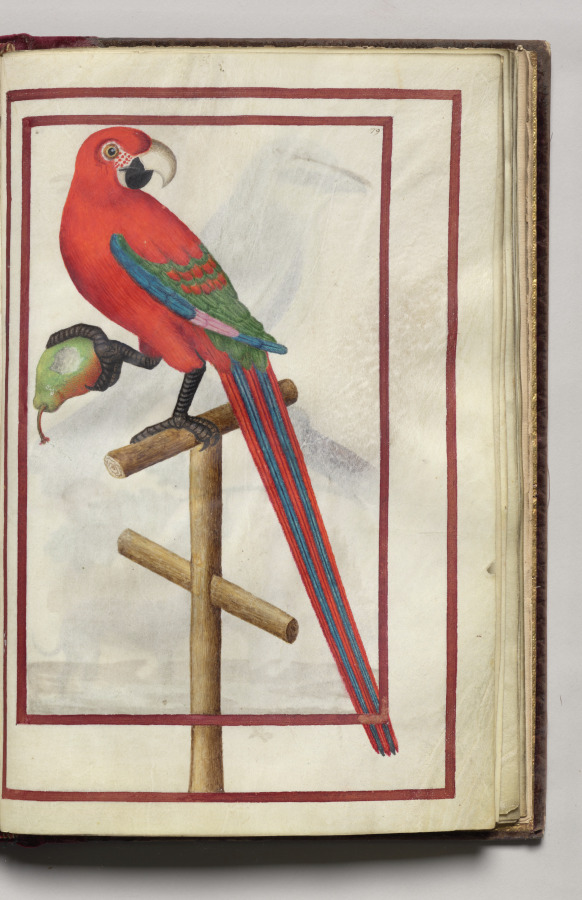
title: Parrot with a Pear, folio 38 (recto), from Florilegium (A Book of Flower Studies)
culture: France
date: 1608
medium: watercolor, ink, silver, and gold over occasional traces of pencil, on vellum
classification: Bound Volume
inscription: Dated: Poitiers 1608 (on frontispiece) Signed: On frontispiece in black ink, lower right: Van Kuyk Notation on drawing: Frontispiece: in pencil, lower margin: * élève de Van Kessel, peintre flammand (* in pencil also appears in front of Van Kuyk's name).